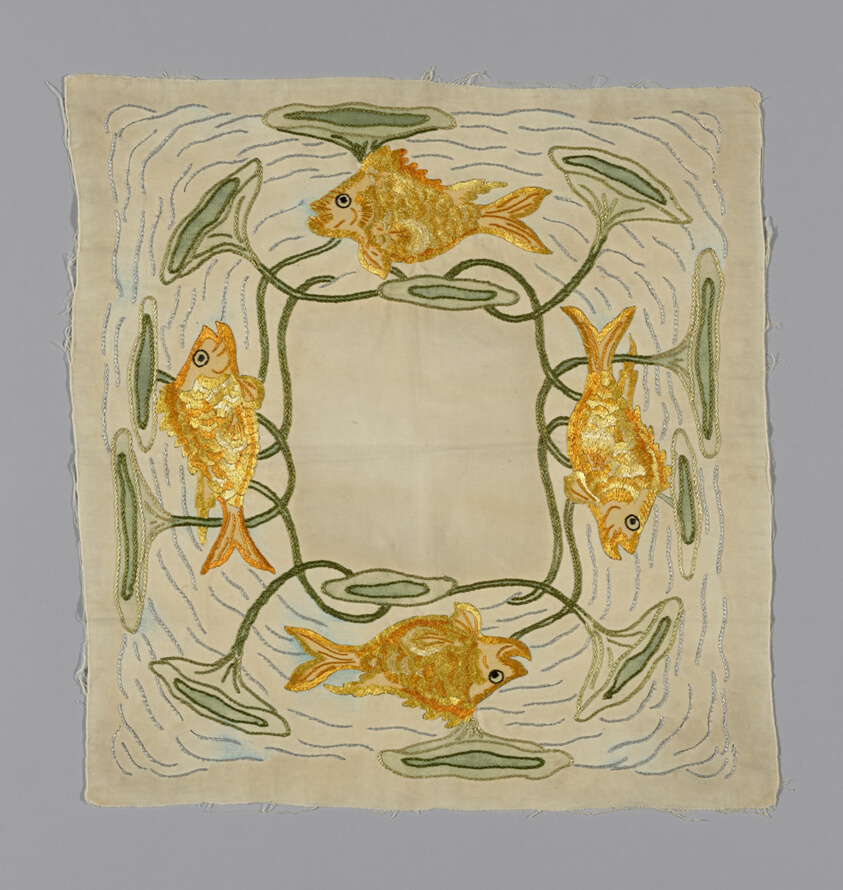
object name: Textile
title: Pillow Cover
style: Arts and Crafts Movement, 19th century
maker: Possibly England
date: c. 1890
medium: Cotton, warp-float faced 'S' twill weave; embroidered with silk in stem and long and short stitches; painted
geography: England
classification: textile; needlework (visual works)